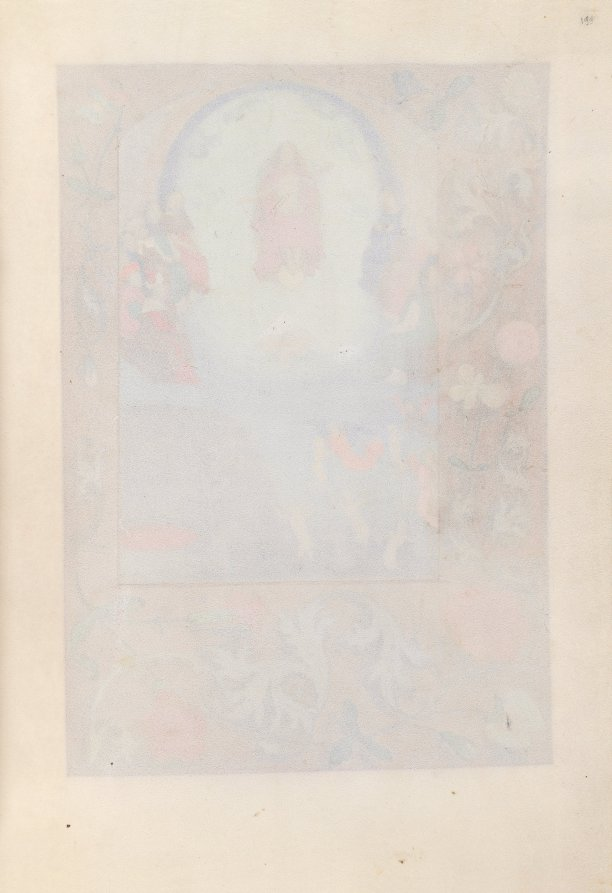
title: Hours of Queen Isabella the Catholic, Queen of Spain: Fol. 199r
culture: Flanders, Ghent and Bruges, late 15th century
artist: Master of the First Prayerbook of Maximillian (Flemish, c. 1444–1519)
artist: and Associates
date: c. 1500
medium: ink, tempera, and gold on vellum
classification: Bound Volume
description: This manuscript was illuminated by a circle of at least five highly organized manuscript painters active in the Flemish cities of Ghent and Bruges. The principal illuminator was Alexander Bening, who painted the majority of the book's miniatures. Manuscripts produced by this circle of artists are renowned for the decoration of their borders, which typically feature a rich variety of realistically-painted flowers, birds, and butterflies. This prayer book, called a book of hours, was intended not for a cleric, but for the private devotions of a lay person-in this case, Isabella the Catholic, Queen of Spain (1451-1504). Isabella's coat of arms embellishes the book's frontispiece. It is unlikely that the book was commissioned by the Queen herself; rather, she probably received it as a diplomatic gift from someone courting her patronage, perhaps Cardinal Francisco Jimenez de Cisneros. A Franciscan friar, Jimenez was dependent upon Isabella for his advancement, first to the post of Queen's confessor in 1492, and then to Archbishop of Toledo in 1495.